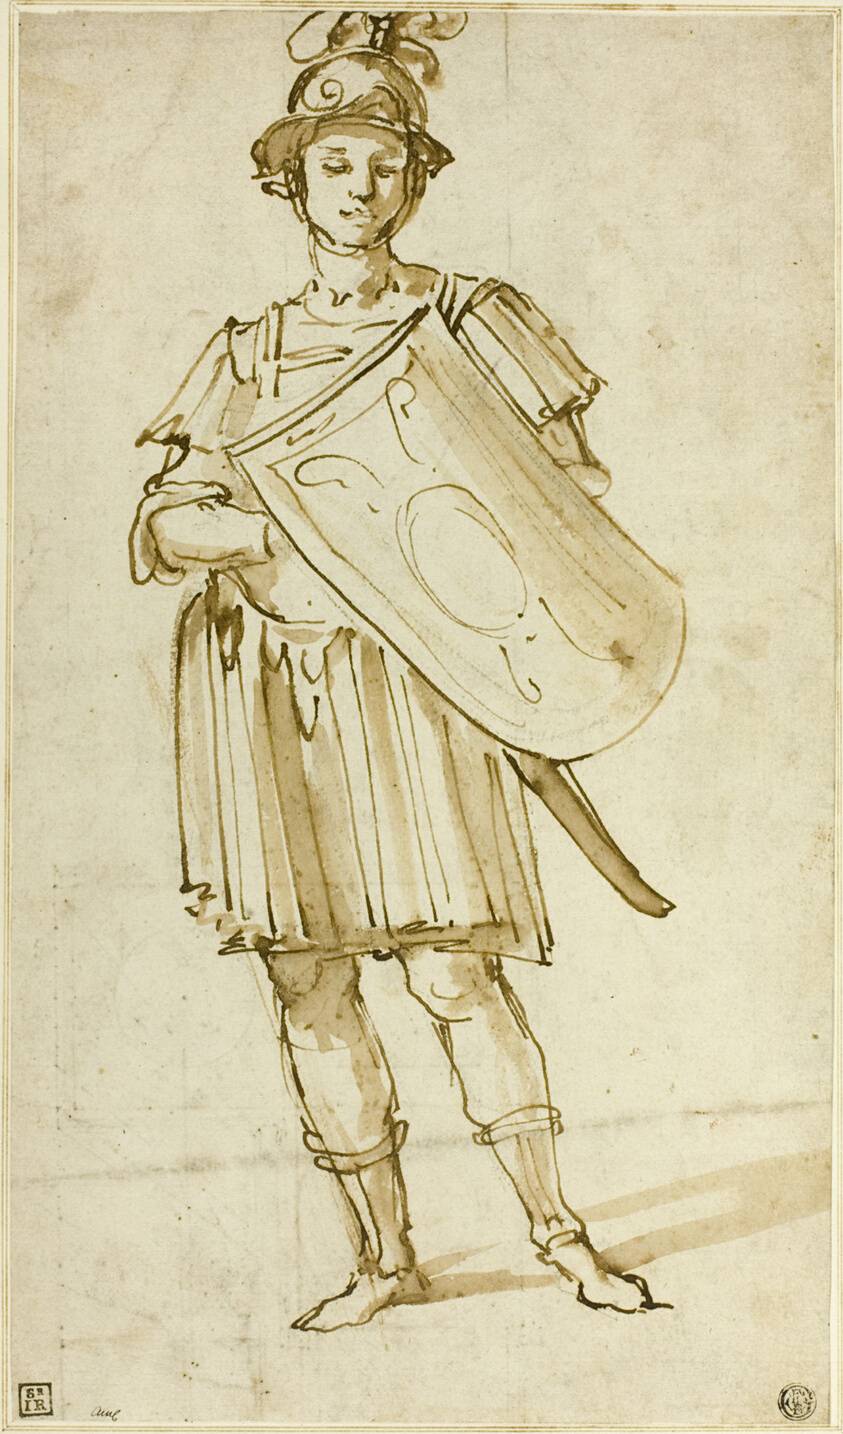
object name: Drawing and Watercolor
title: Standing Warrior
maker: Unknown Artist; Italian, Florentine or Genoese, 1575-1599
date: c. 1600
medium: Pen and brown ink with brush and brown wash, over black chalk, on ivory laid paper, laid down on ivory laid board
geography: Italy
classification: ink with wash; drawings (visual works); prints and drawing